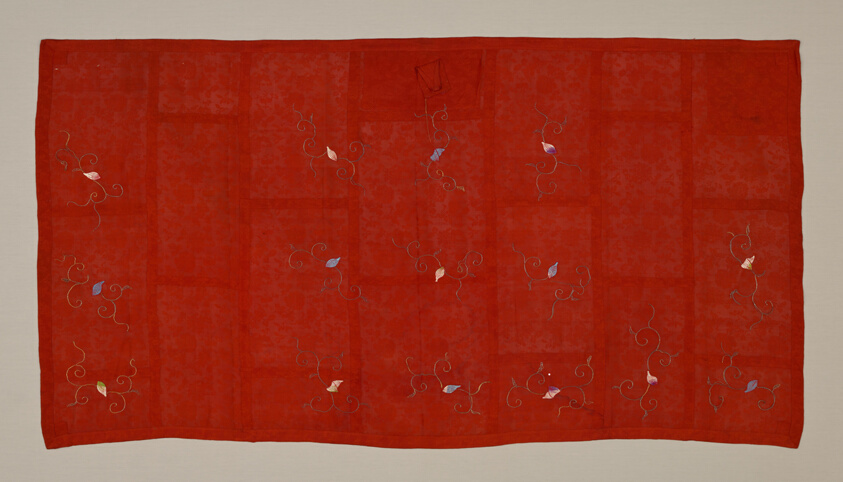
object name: Textile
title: Kesa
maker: Japan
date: late Edo period (1789–1868), 1804/44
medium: Silk, plain weave with rows of 1:1 plain gauze crossings (yoko ro), self-patterned by areas of combined twill weave; pieced; embroidered with silk, gold-leaf-on-lacquered paper strip wrapped cotton, laidwork and couching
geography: Japan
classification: textile; needlework (visual works); weaving; liturgical - buddhist